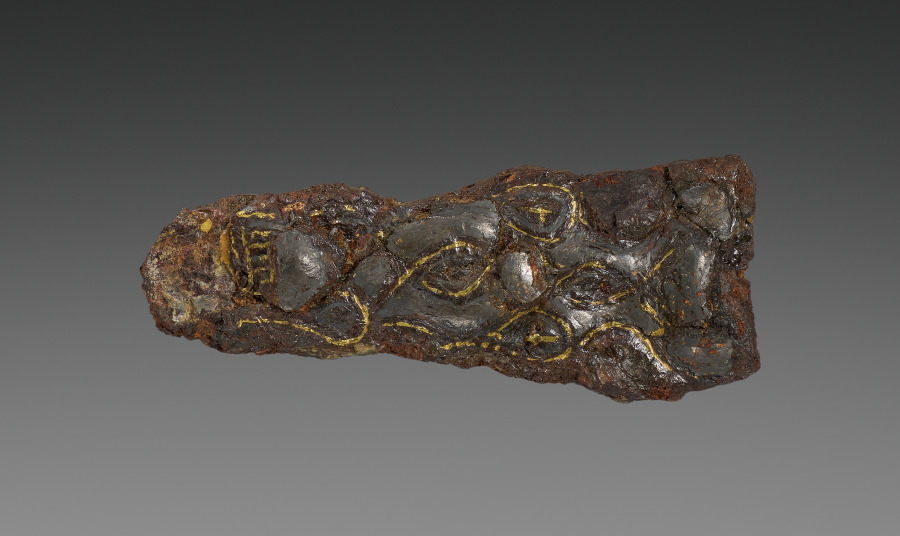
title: Buckle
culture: Merovingian, Burgundian, Migration period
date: 600s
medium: iron with silver overlay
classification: Jewelry